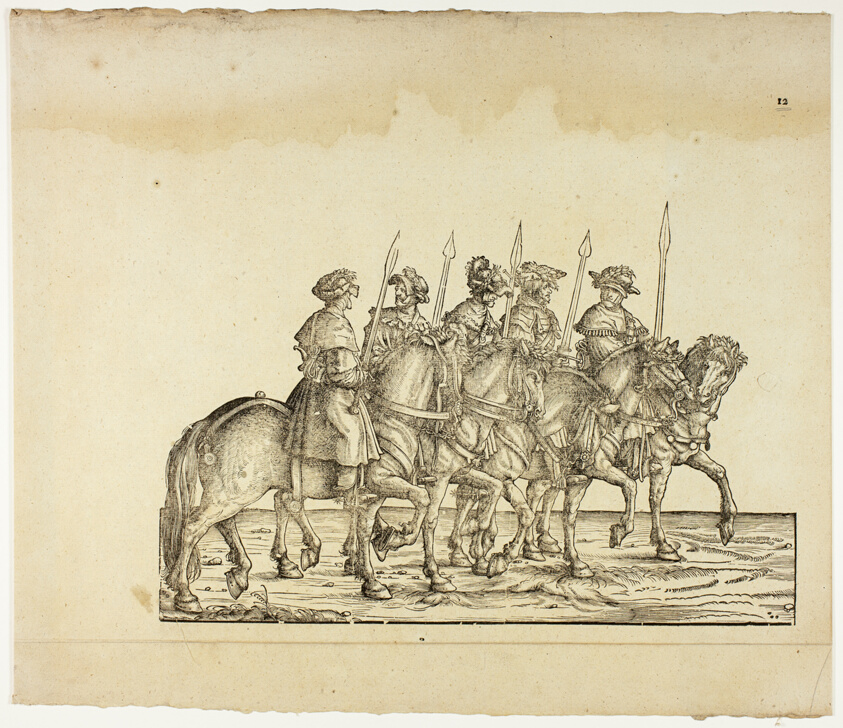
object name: Print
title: Triumph of Maximilian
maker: Hans Burgkmair, the elder (German, 1473-1531)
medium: Woodcut on paper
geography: Germany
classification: print; prints and drawing